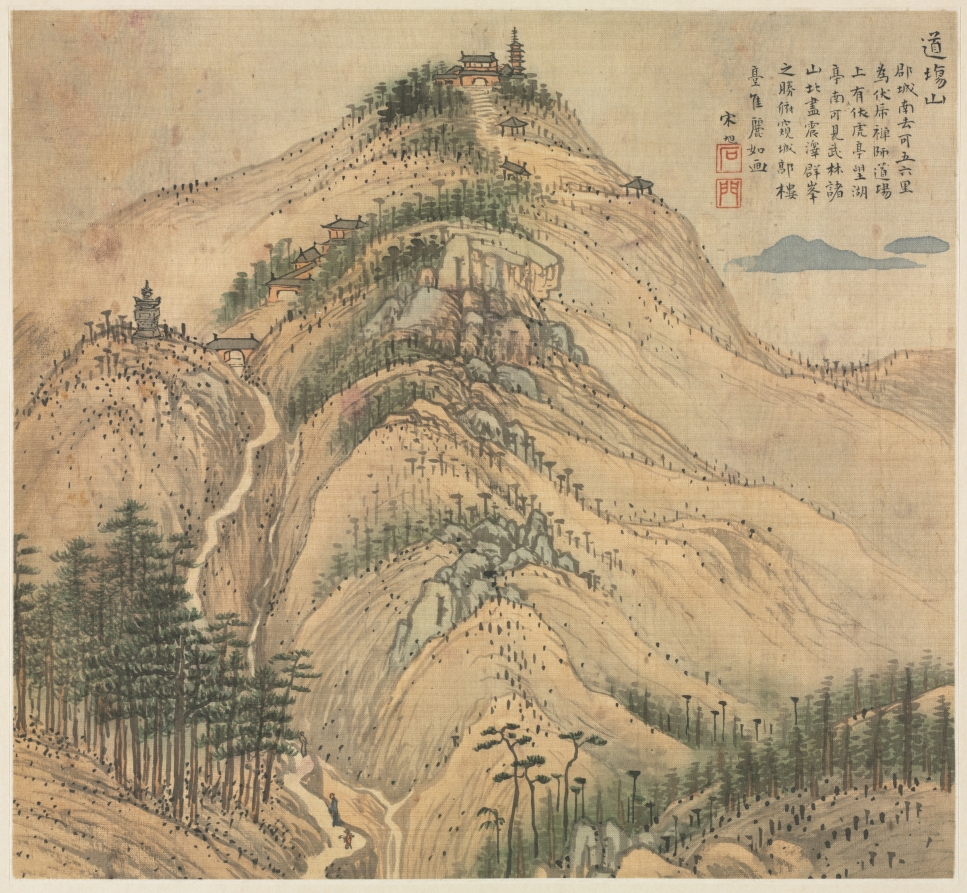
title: Mt. Daochang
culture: China, Jiaxing, Ming dynasty (1368–1644)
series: Eighteen Views of Huzhou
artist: Song Xu (Chinese, 1525-c. 1606)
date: c. 1588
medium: Album leaf; ink and color on silk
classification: Painting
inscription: 道場山：郡城南去，可五六里，為伏虎禪師道場。上有伏虎亭、望湖亭。南可見武林諸山。北盡震澤群峯之勝。俯窺城郭樓臺，佳麗如畫。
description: This album of landscape paintings depicts the famous scenic areas located in and around the city of Wuxing in southeastern China. These places were all known for their natural beauty, but in addition, a number were distinguished by their links to eminent historical figures and events. The artist, Song Xu, was not a native of Wuxing, but must have visited it when he accepted the commission, for he carefully depicted all eighteen views and wrote comments on each of them. Song's gazetteerlike notation on this leaf reads: Mount Daochang: From the prefectural city toward the south, about 5 to 6 li, there is the spiritual abode of Chan Master Fuhu [master who tamed tigers, or Zhifeng 志逢, 909–985]. On top [of the hill] are the Fuhu and Wanghu Pavilions. Looking farther south, one can see the mountains of Hangzhou. Looking toward the north, one can see all the way to Lake Tai and its hilly islands. Looking down, the city walls below with its towers and terraces are as splendid as in a painting.